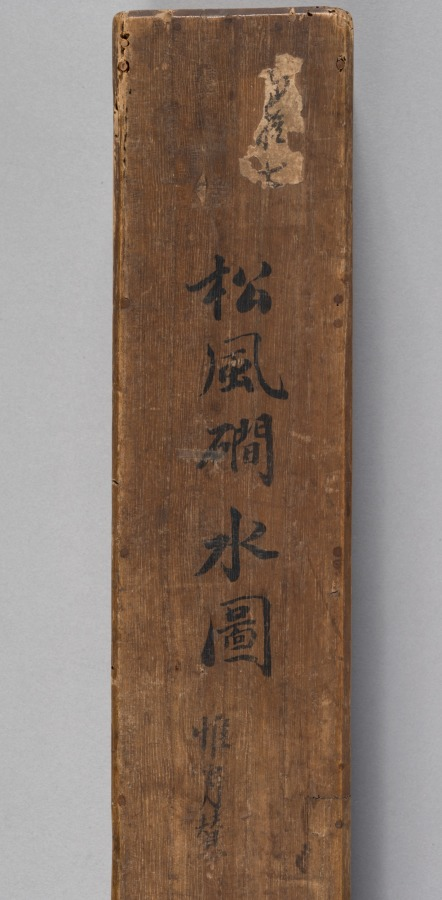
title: Landscape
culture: Japan, possibly Edo period (1615-1868)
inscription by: copy after Ishō Tokugan (Japanese, c. 1359–1437)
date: early 1600s to mid-1800s?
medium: hanging scroll; ink and slight color on paper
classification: Painting